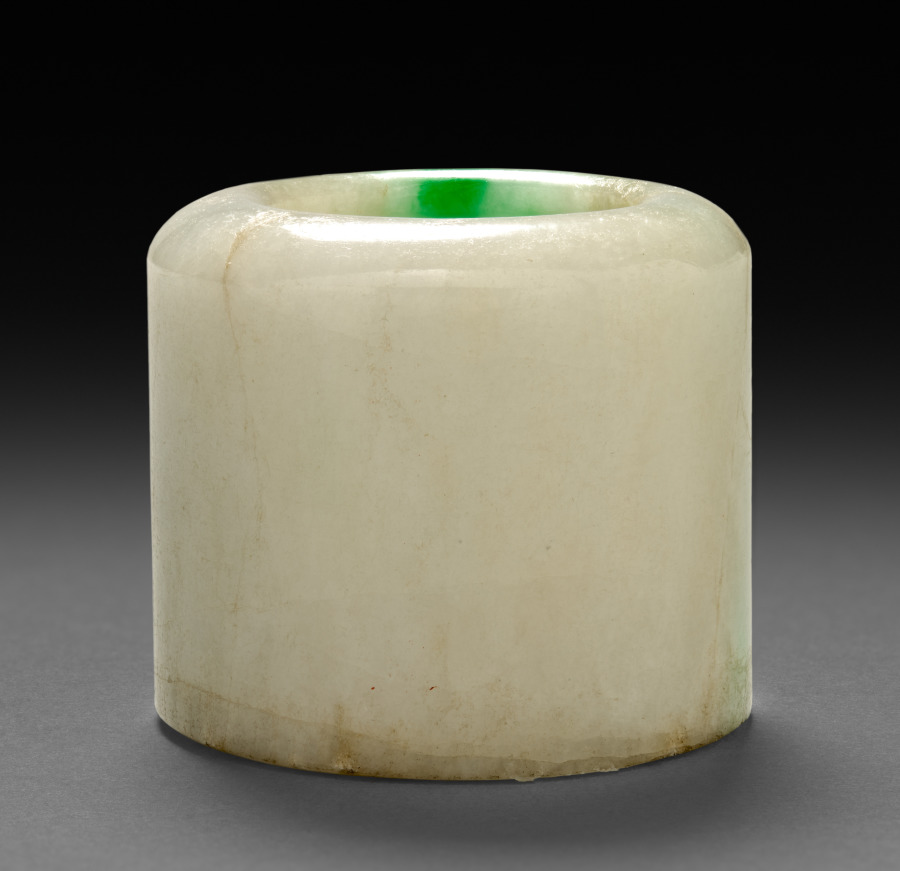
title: Thumb Ring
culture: China, Qing dynasty (1644-1911) or Republican period (1912-49)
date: 1800s–1900s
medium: white and green jade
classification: Jewelry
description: Jade rings were worn by men on the thumb of the right hand to assist with holding and pulling the string of the archer’s bow. However, thumb rings were also fashionable accessories for civil officials in the late Qing dynasty.